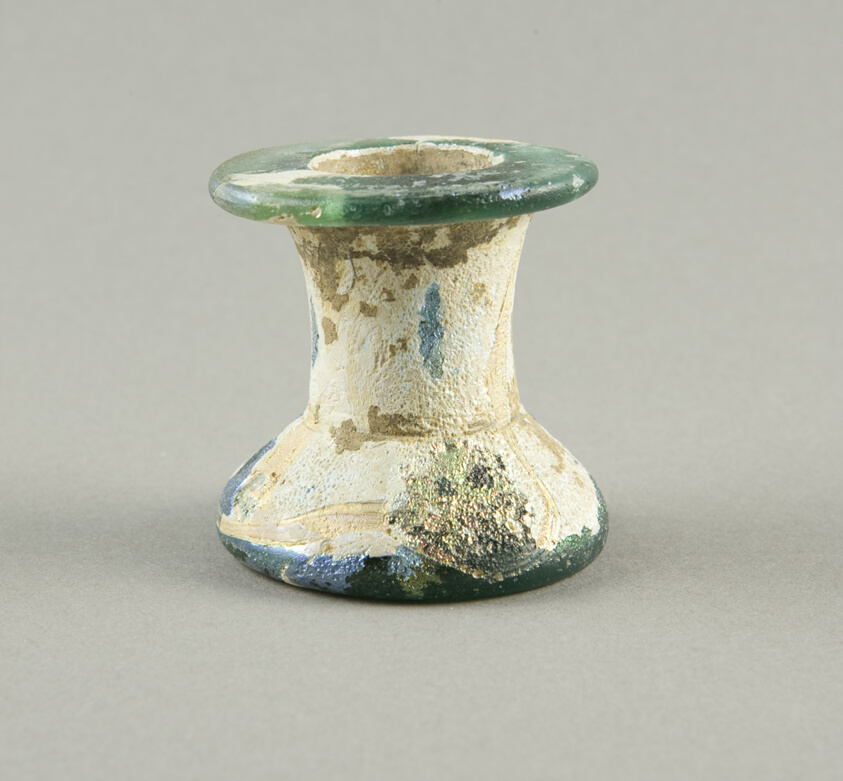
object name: Vessel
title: Jar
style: syrian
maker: Roman; Levant or Syria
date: 1st century (?)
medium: Glass, blown technique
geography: Syria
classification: glass; vessel; ancient art